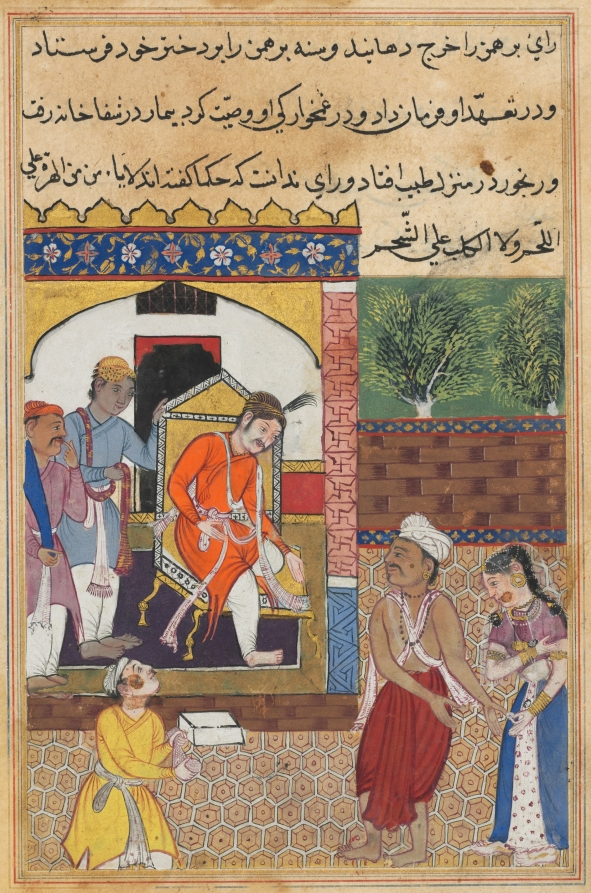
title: The magician, disguised as a Brahman, visits the king of Babylon, from a Tuti-nama (Tales of a Parrot): Thirty-fifth Night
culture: Mughal India, court of Akbar (reigned 1556–1605)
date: c. 1560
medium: gum tempera, ink, and gold on paper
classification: Painting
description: The king of Babylon, seated on a throne, receives the Brahman in the form of a woman and the magician in the form of a Brahman. The king agrees to keep the woman (the transformed Brahman) temporarily in his harem as a favor to the Brahman (the disguised magician). Scholars have identified this image as a portrait of Akbar, the third Mughal emperor of India, and the commissioner of this manuscript. He is thought to be identifying himself as the king of Babylon, regarded in the Islamic world as an ancient center of power and culture. In this story, however, the king fell victim to the trickery of his own daughter, her lover, and the magician, making one wonder why Akbar would choose to portray himself in this guise. The identification of this image as a portrait of Akbar remains unresolved.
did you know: The transformed Brahman, who is in the form of the woman, carries a magical bead in his mouth.